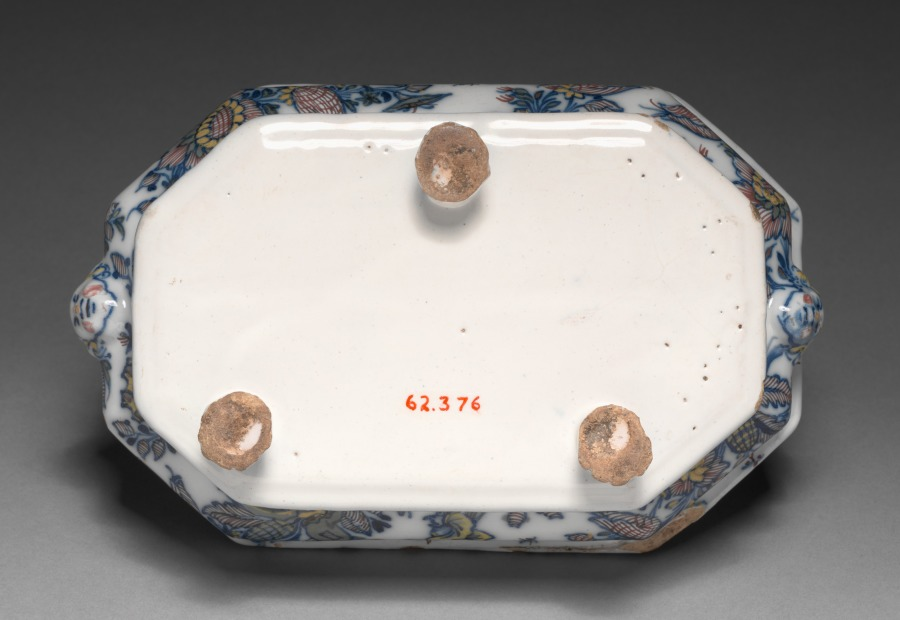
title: Cruet Stand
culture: France, Marseilles, 18th century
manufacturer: Héraud- LeRoy Factory (French)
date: c. 1740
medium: Tin- glazed earthenware (faience) wth underglaze blue decoration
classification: Ceramic